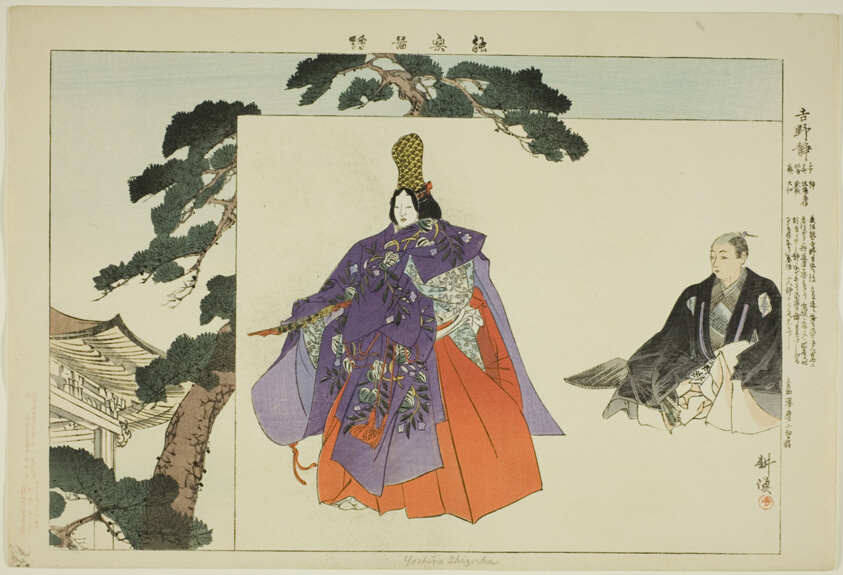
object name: Print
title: Yoshino Shizuka, from the series "Pictures of No Performances (Nogaku Zue)"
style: Japanese (culture or style)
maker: Tsukioka Kogyo; Japanese, 1869-1927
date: 1898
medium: Color woodblock print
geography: Japan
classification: woodblock print; print; asian art